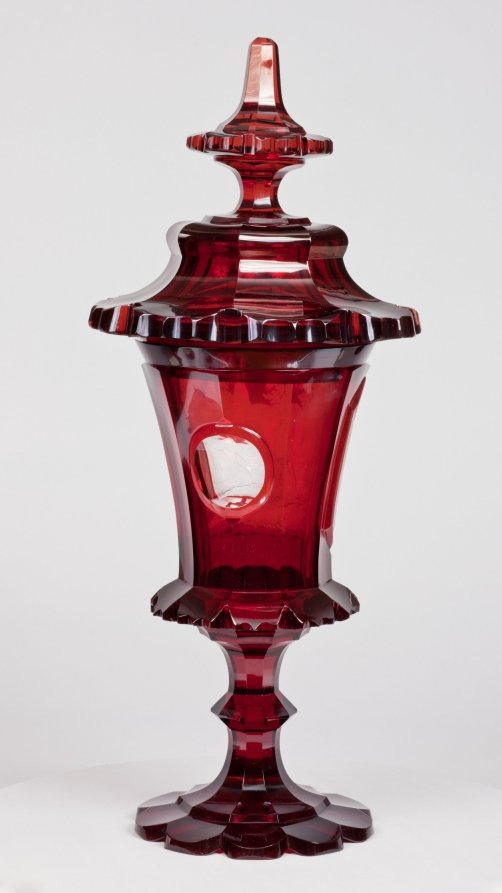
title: Covered Cup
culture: Bohemia, 19th century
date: mid-1800s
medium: ruby glass with engraved decoration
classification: Glass